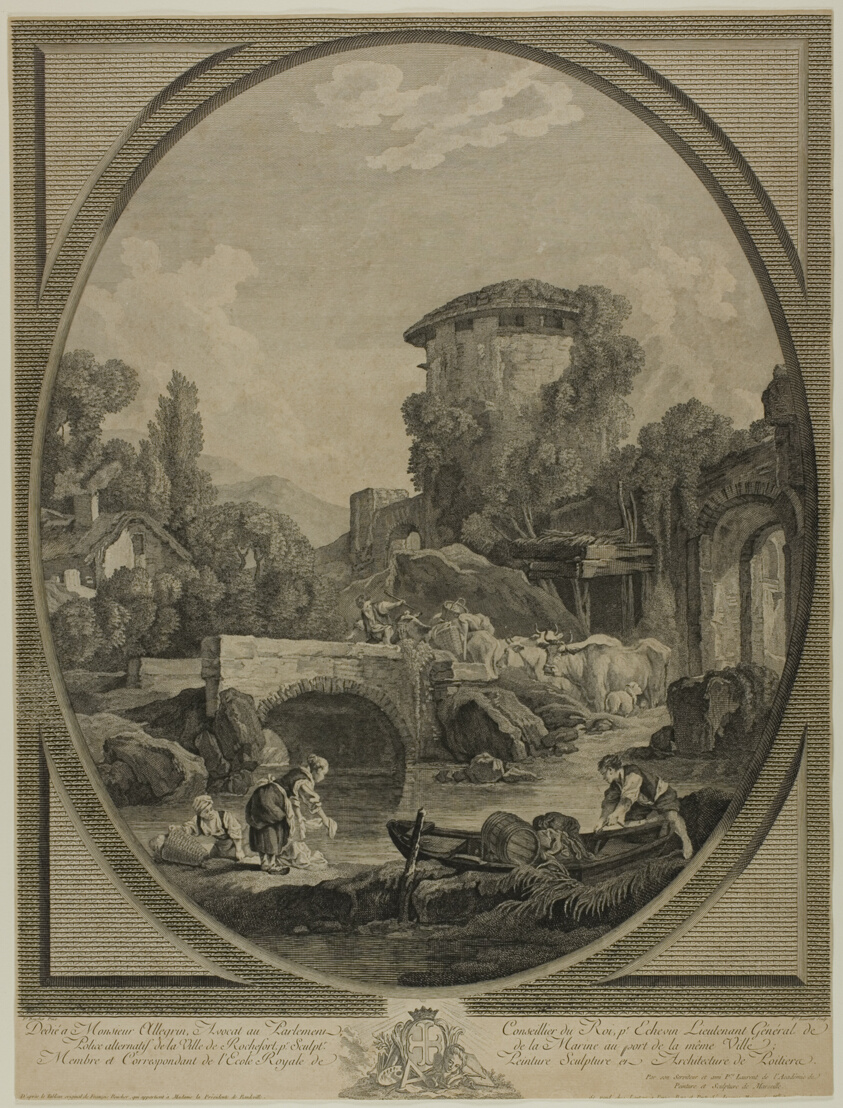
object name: Print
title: Landscape with a Bridge and a Dovecote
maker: Pierre François Laurent (French, 1739-1809); after François Boucher (French, 1703-1770)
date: 18th century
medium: Engraving and etching on paper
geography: France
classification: engraving; print; prints and drawing